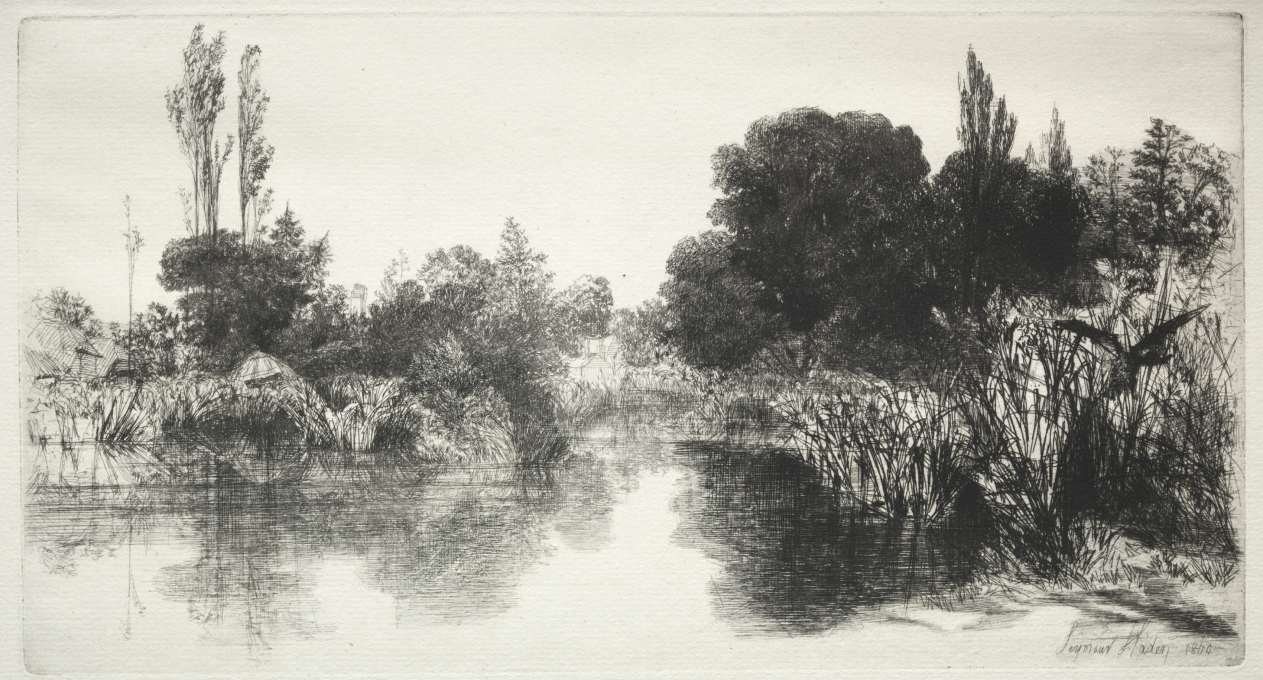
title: Shere Mill Pond (The Larger Plate)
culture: England, 19th century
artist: Francis Seymour Haden (British, 1818–1910)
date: 1860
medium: etching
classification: Print